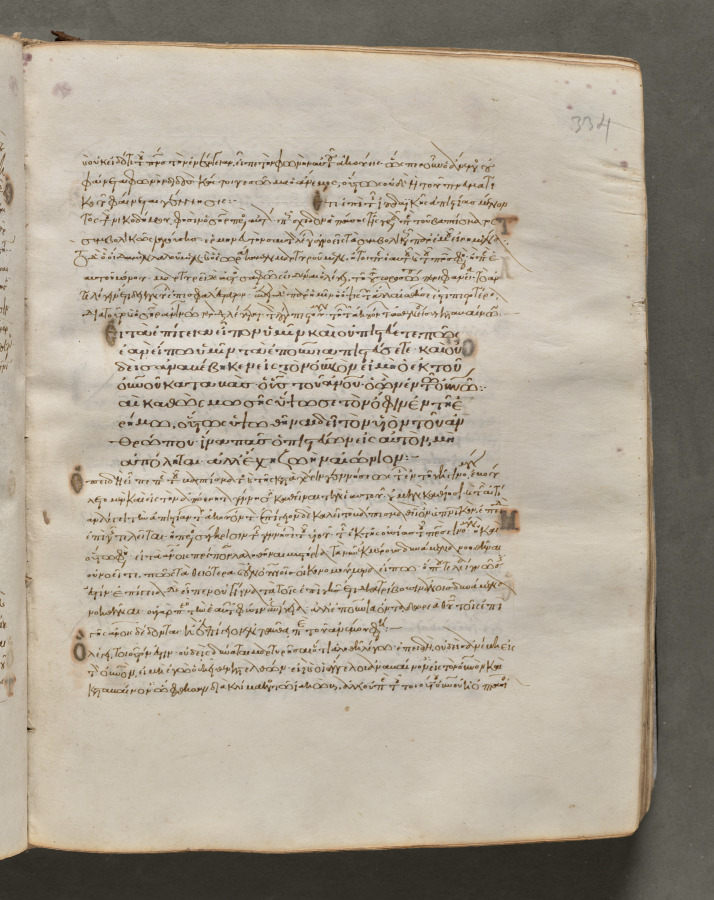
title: Text, folio 334 (recto), from a Gospel Book with Commentaries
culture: Byzantium, Constantinople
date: c. 1000–1100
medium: ink, tempera, and gold on vellum; leather binding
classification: Bound Volume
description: Each of the four gospels in this book opens on a page with brilliantly illuminated borders depicting the author of the text as well as birds—principally peacocks, symbols of the immortality of the soul—and fountains, representing the fountain of life and the salvation of the soul. This volume consists of 428 leaves with texts in Greek. Its level of sophistication suggests that it was probably written and decorated in a monastery in Constantinople.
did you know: Gospel books were carried in procession through Byzantine churches.